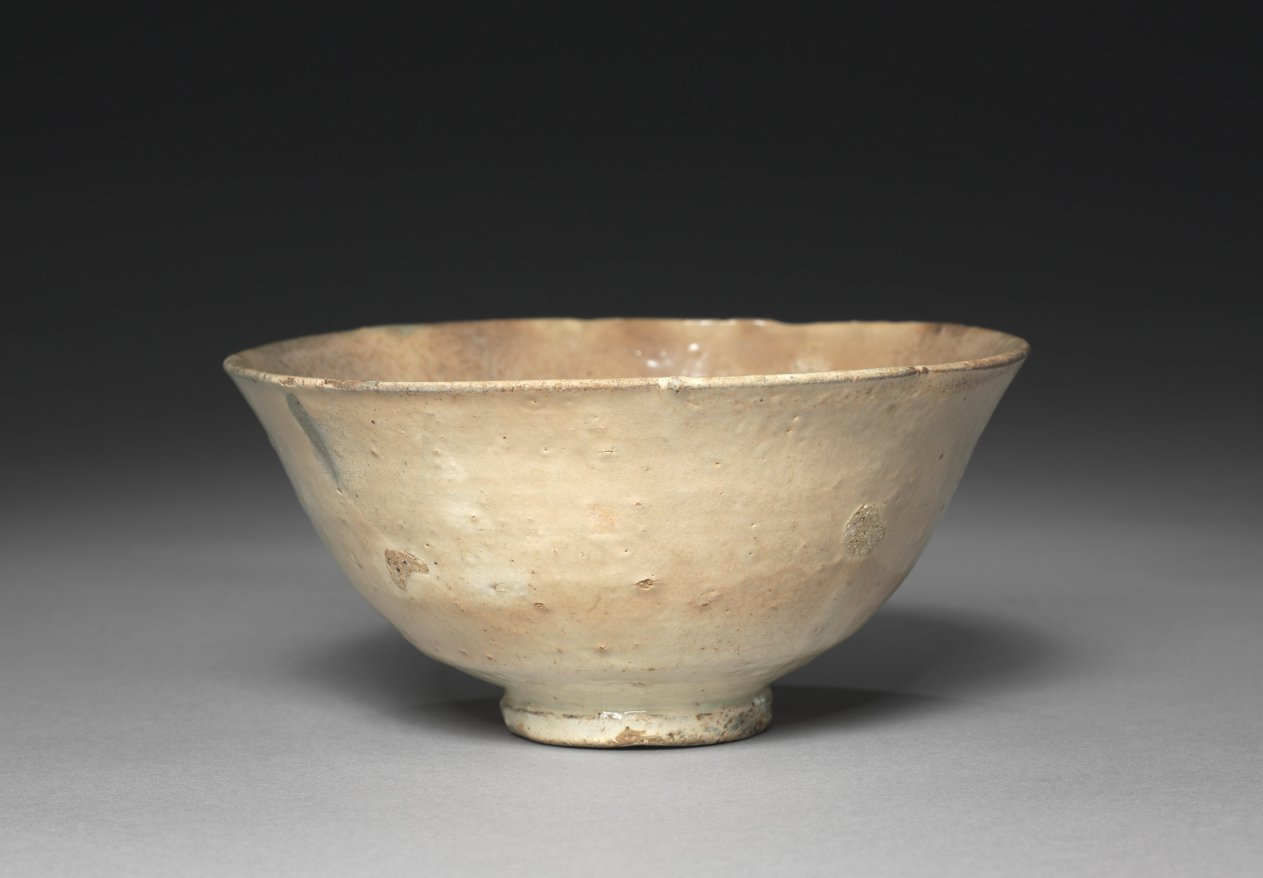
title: Tea Bowl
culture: Korea, Joseon dynasty (1392–1910)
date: 1700s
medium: stoneware with white slip and overglaze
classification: Ceramic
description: This type of wide-mouthed bowl was used every day in Korea, not exclusively for tea drinking. But when it was introduced to Japan around the early 16th century, its imperfect appearance, which evokes the aesthetics of wabi-sabi, caused it to be repurposed as a tea bowl. Korean tea bowls were circulated as a item of foreign luxury among Japanese military elites. Possibly produced in one of the kilns established by the trading office (Waegwan) in Busan, southern Gyeongsang province, this type of tea bowl was sold to Japanese tea bowl collectors. According to a historical record dated to 1641, one trading boat shipped more than 14,000 tea bowls to Japan.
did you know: This type of rustic-looking tea bowl was produced in one of the kilns established by the trading office (Waegwan) in Buan, southern Gyeongsang province, for Japanese tea bowl collectors who admired the beauty of imperfection.